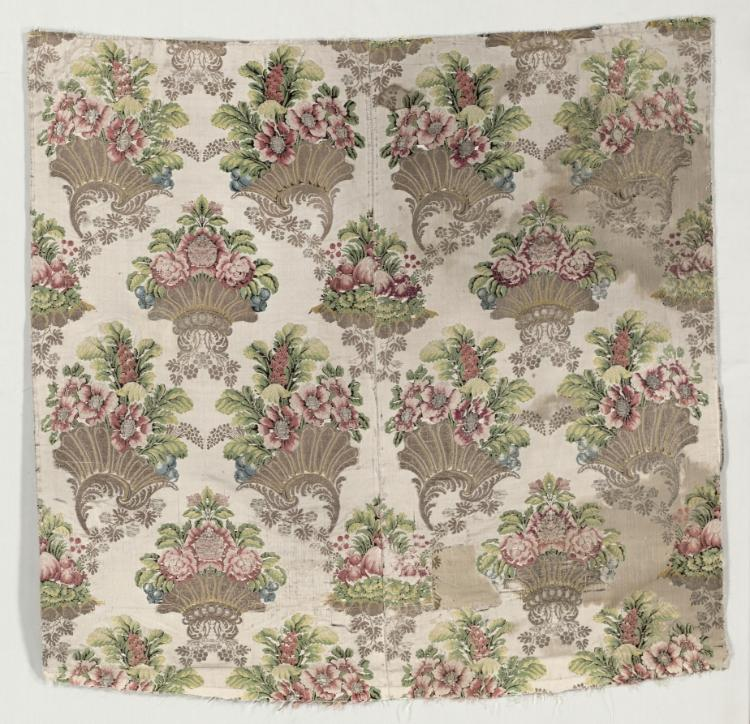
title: Cover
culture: Italy, early 18th century (period of Louis XIV, 1643-1715)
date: early 1700s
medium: brocade; silk and metal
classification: Textile